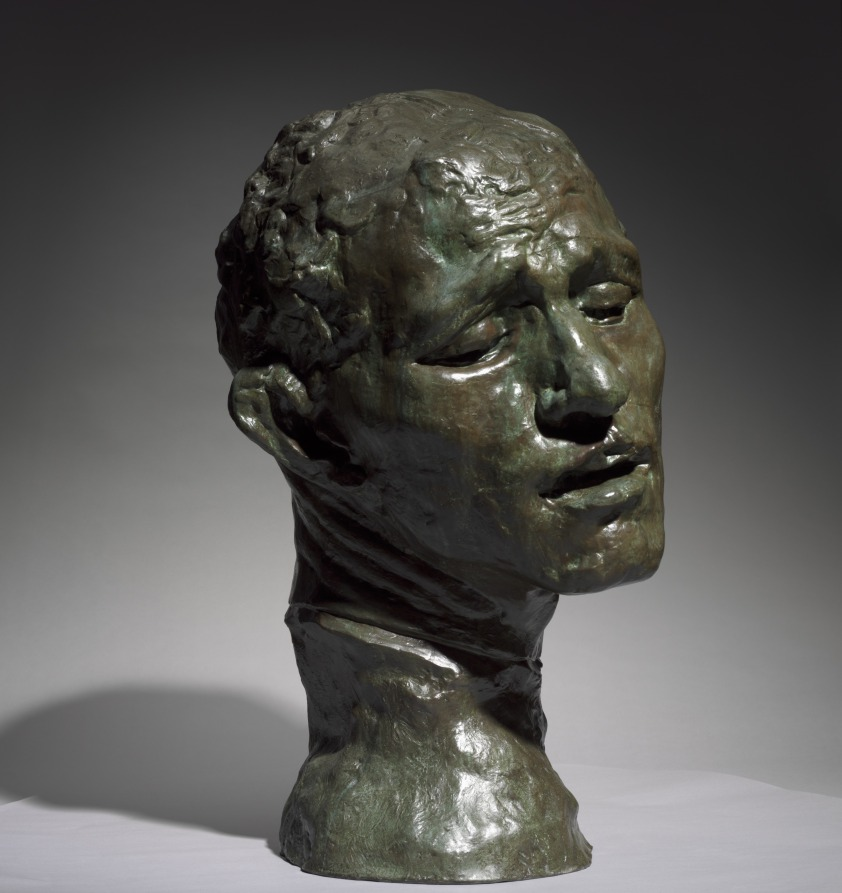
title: Heroic Head of Pierre de Wissant, One of the Burghers of Calais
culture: France, 19th century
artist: Auguste Rodin (French, 1840–1917)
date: 1886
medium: bronze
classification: Sculpture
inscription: inscribed at neck, left: A.Rodin; inscribed lower back: Alexis Rudier/Fondeur-Paris.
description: This sculpture depicts one of the figures in Rodin’s large public monument The Burghers of Calais (1884–89), featuring six French men who volunteered to be taken prisoner by the English in exchange for lifting the siege of Calais during the Hundred Years War (1337–1453). Pierre de Wissant’s anguished expression suggests extreme mental suffering as he contemplates his expected execution. Rodin exhibited a life-size version of the figure as an independent work before completing the monument. He later made multiple versions in various sizes and media.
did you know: This sculpture depicts the head of a figure from Rodin's large public monument The Burghers of Calais (1884-89). The CMA also owns a plaster version of the head.